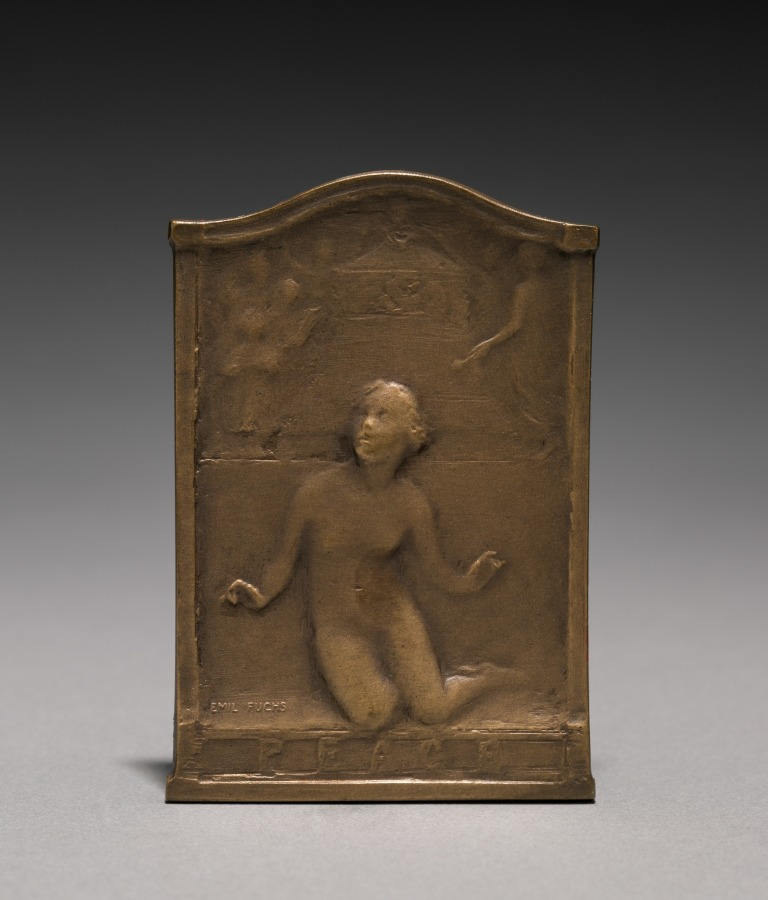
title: Medal: Commemorates the Signing of Peace, No. 39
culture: America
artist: Emil Fuchs (American, born Austria, 1866–1929)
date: 1918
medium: bronze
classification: Metalwork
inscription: "PEACE."